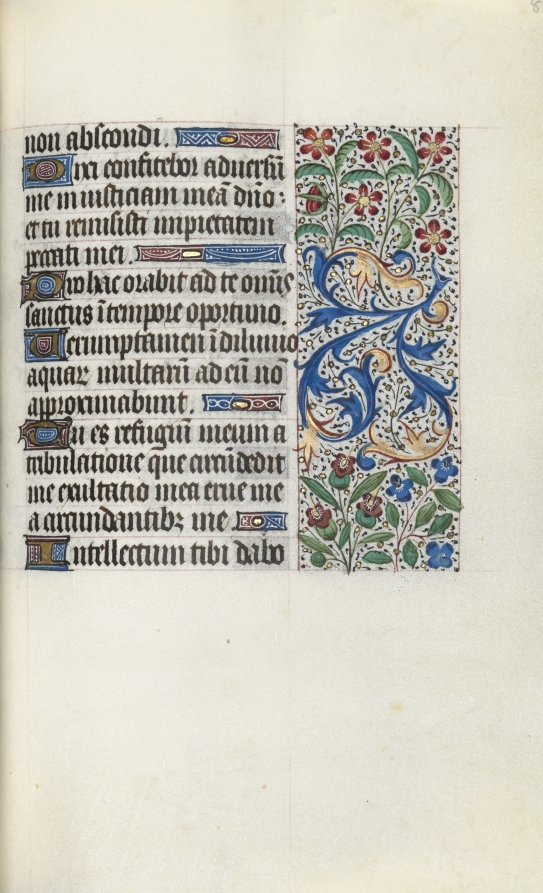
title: Book of Hours (Use of Rouen): fol. 82r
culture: France, Rouen, 15th century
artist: Master of the Geneva Latini (French, active Rouen, 1460–80)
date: c. 1470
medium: ink, tempera, and gold on vellum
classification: Bound Volume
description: In the late 1400s and early 1500s Rouen was an established and important center of book production. The city’s cathedral had a wealthy chapter that spent large sums of money to commission books and to maintain its extensive library. The stationers and booksellers would have likely been concentrated in or near the cathedral precinct. This artist, named after a manuscript now in Geneva, was Rouen’s principal illuminator during the second half of the 1400s.